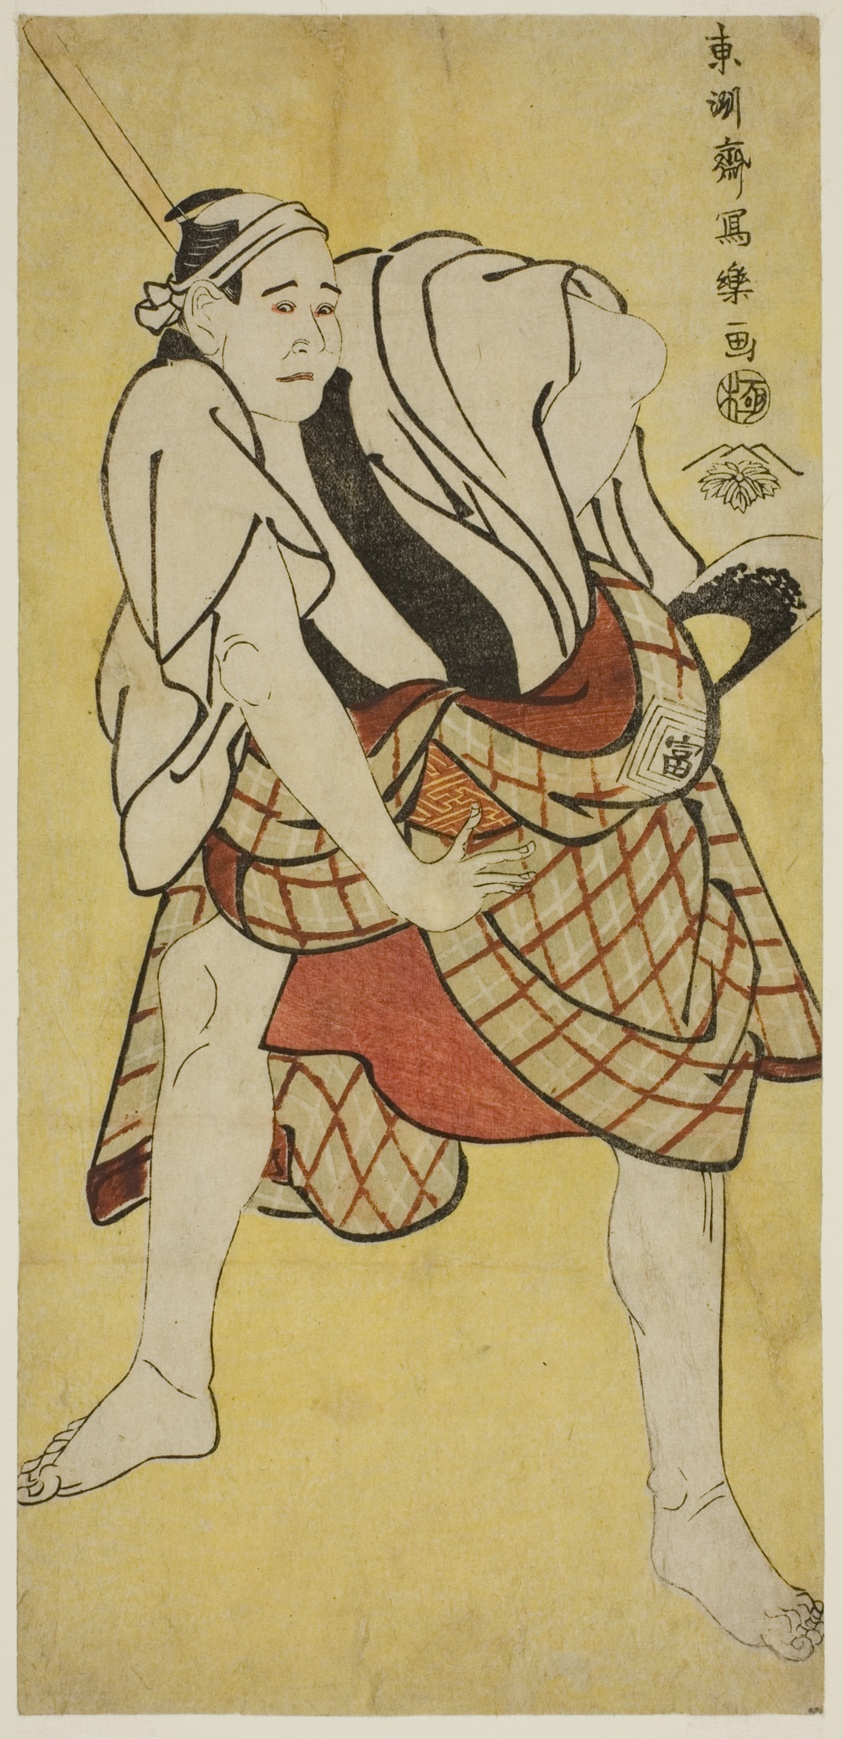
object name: Print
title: The actor Ichikawa Tomiemon as Inokuma Monbei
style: Japanese (culture or style)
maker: Toshusai Sharaku 東洲斎 写楽; Japanese, active 1794-95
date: 1794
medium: Color woodblock print; hosoban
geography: Japan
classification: woodblock print; print; asian art